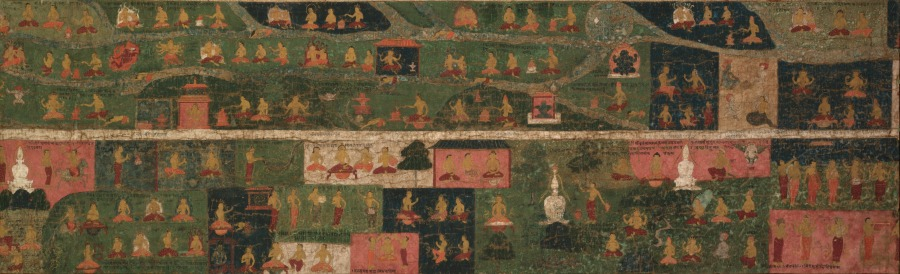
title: Temple Banner with pilgrimage sites and scenes from the "Svayambhu-purana" (Ancient Text of the Primordial Buddha)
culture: Nepal, Kathmandu Valley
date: 1635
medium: Gum tempera and gold on cotton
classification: Painting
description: In the upper band, pilgrimage places in and around Nepal’s capital of Kathmandu are mapped and labeled with inscriptions in the Newari language. Below are scenes from the story of a king who ended a drought with the assistance of serpent deities and a Buddhist master. The king rides horseback at the lower left, and the serpent deities are the seated human figures with snake heads behind them. The white vase-shaped monument with pointed top, shown three times, is the Svayambhu Stupa, a sacred monument in Kathmandu dedicated to the Buddha Svayambhu. Probably half of a complete banner, this piece hung in a monastic courtyard during annual festivals.